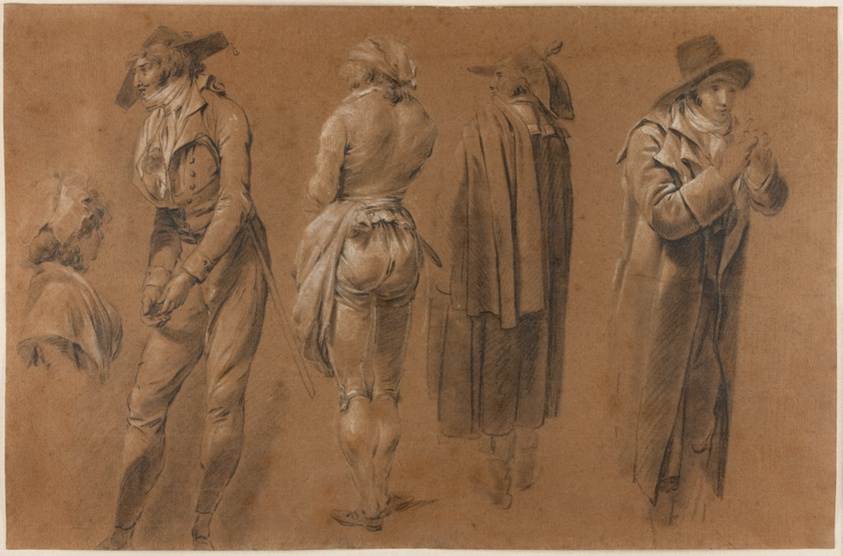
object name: Drawing and Watercolor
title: Study for The Speculators at the Palais Royal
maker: Louis Léopold Boilly; French, 1761-1845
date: 1797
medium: Black chalk with stumping, heightened with white chalk, on tan laid paper toned with a light brown wash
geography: France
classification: drawings (visual works); prints and drawing